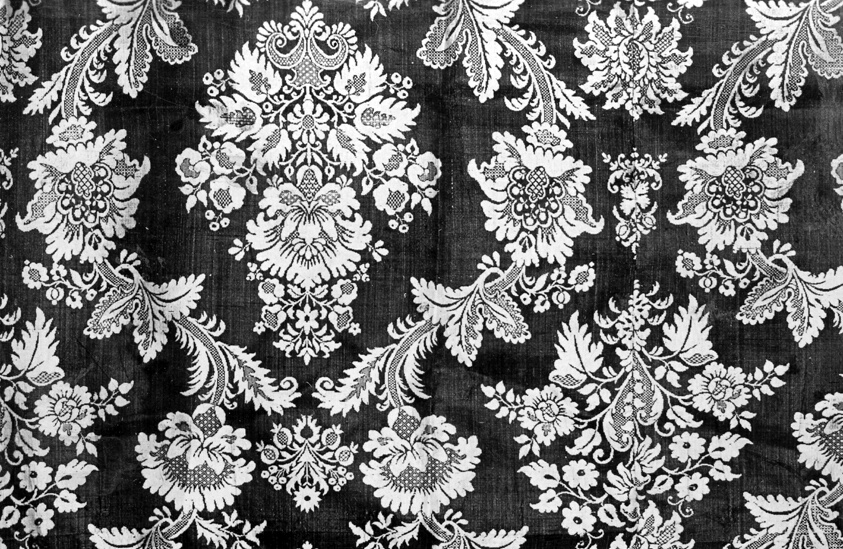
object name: Textile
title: Panel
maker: France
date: 18th century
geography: France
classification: textile; weaving